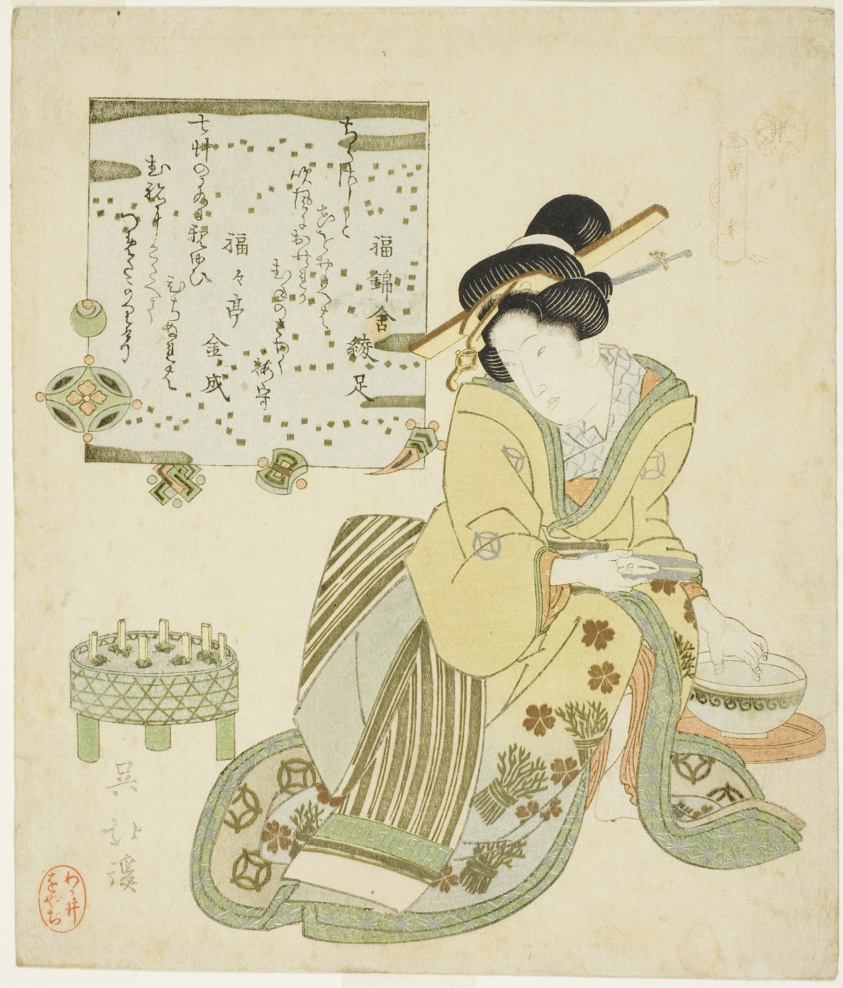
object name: Print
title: Zeng Shen (Jp: So Shin), from the series "Twenty-four Paragons of Filial Piety (Nijushiko)"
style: Japanese (culture or style)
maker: Totoya Hokkei (Japanese, 1780-1850)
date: c. 1825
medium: Color woodblock print; shikishiban, surimono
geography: Japan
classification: woodblock print; print; asian art